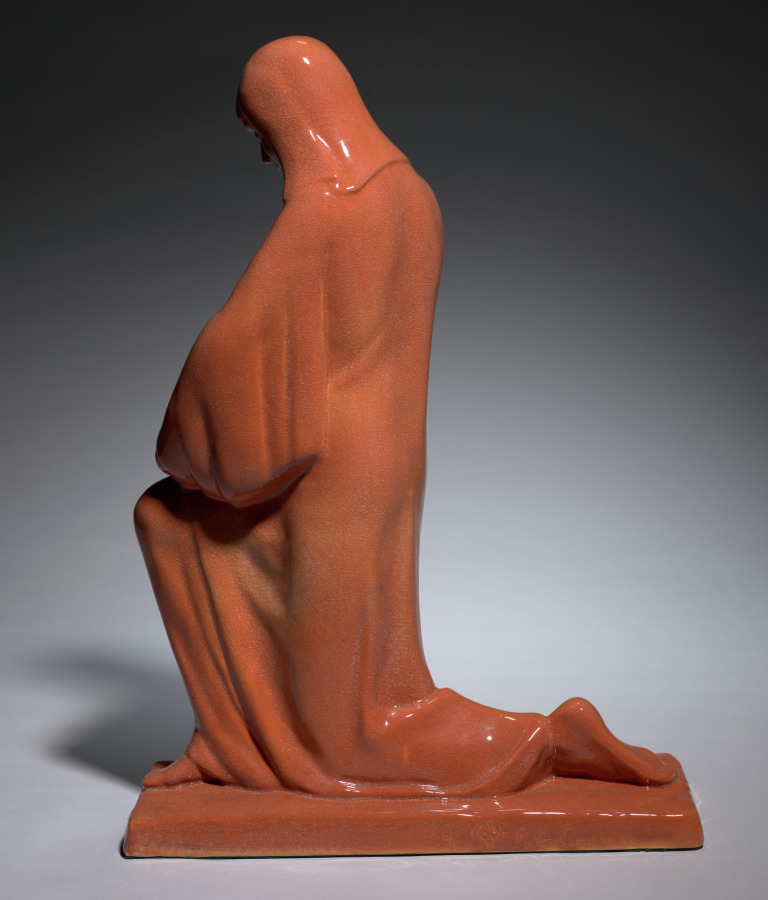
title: Madonna and Child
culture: America, Ohio, Cleveland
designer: R. Guy Cowan (American, 1884–1957)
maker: Cowan Pottery Studio (America, Ohio, Lakewood, 1913–1919)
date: c. 1928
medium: pottery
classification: Ceramic